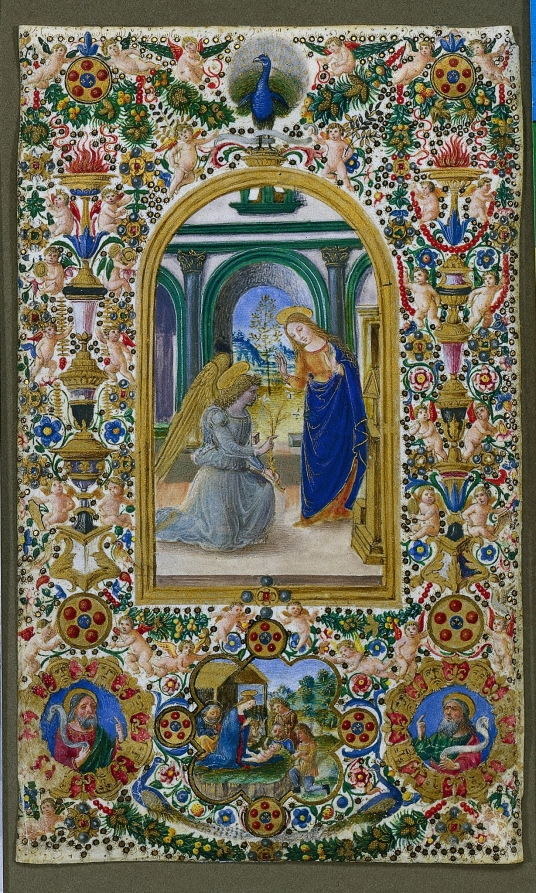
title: Leaf from a Book of Hours: Annunciation, Nativity and Two Prophets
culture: Italy, Florence, 15th century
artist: attributed to Master of Riccardiana 231 (Italian)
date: c. 1485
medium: tempera and gold on parchment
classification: Manuscript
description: This leaf came from a book of hours, a devotional book popular in the Middle Ages. They contained prayers that a devoted individual would use throughout the day. It has been estimated that 1 in 15 households owned a book of hours, although this luxurious example could only have belonged to an aristocratic household.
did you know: Peacocks were often used in medieval Christian art as a symbol of the resurrection and eternal life.